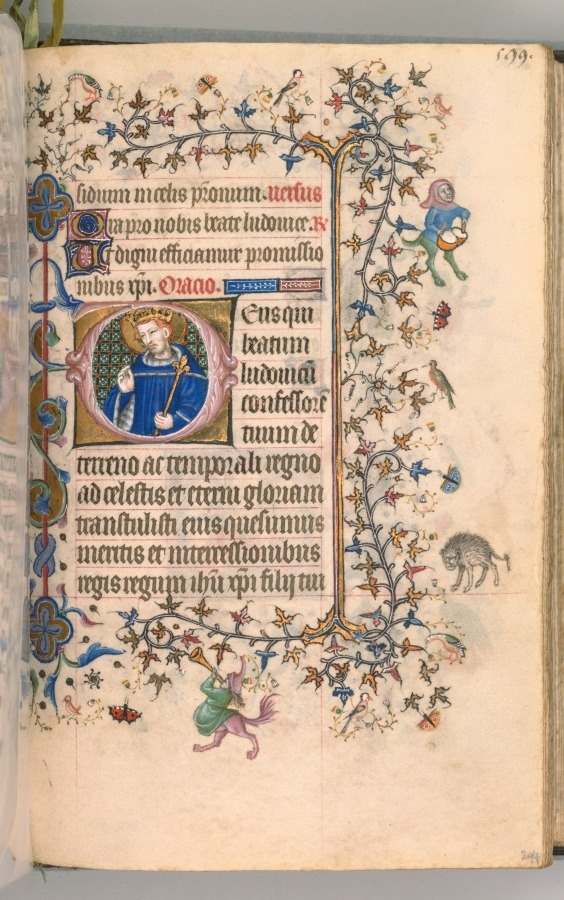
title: Hours of Charles the Noble, King of Navarre (1361-1425): fol. 291v, St. Louis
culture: France, Paris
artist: Master of the Brussels Initials and Associates (French)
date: c. 1405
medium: ink, tempera, and gold on vellum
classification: Bound Volume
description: This precious volume was obviously highly prized by its owner, the French-born King of Navarre, who had his coat of arms painted on no less than twenty folios. Rather than directly commissioning this manuscript from a specific workshop, it seems that Charles the Noble acquired his book of hours -- perhaps ready-made for the luxury market -- while on a trip to Paris in 1404-05. A collaborative effort, six painting styles are evidenced within the pages of this codex, those of two Italians, two Frenchmen, and two Netherlanders. The painter who was responsible for the planning and decoration of the book, and who produced seventeen of the large miniatures, was a Bolognese artist known as the Master of the Brussels Initials. His principal assistant, responsible for most of the borders, was a Florentine who signed his name "Zecho" da Firenze on folio 208 verso.